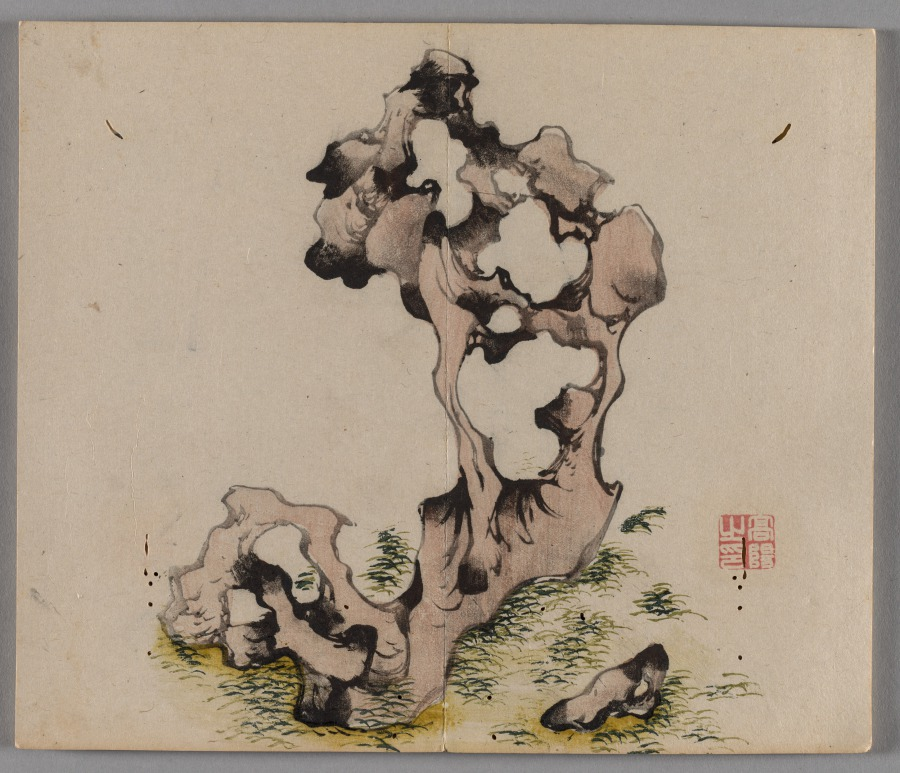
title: Ten Bamboo Studio Painting and Calligraphy Handbook (Shizhuzhai shuhua pu): Rocks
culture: China, Qing dynasty (1644-1911)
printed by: Hu Zhengyan (Chinese, c. 1584–1674)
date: 1633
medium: Woodblock-printed book; ink and colors on paper; first edition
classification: Print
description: Color printing reached a level of perfection in the early 1600s, as seen in this Ten Bamboo Studio Collection of Calligraphy and Painting and the Mustard Seed Garden Manual of Painting (printed 1679 and 1701). The painterly quality, precision in registering (aligning) the woodblocks, and harmonious colors made them the most successful color print editions in Chinese history. Both editions were printed and compiled in Nanjing, spread nationwide, and had a great impact on the arts in Japan and Korea.